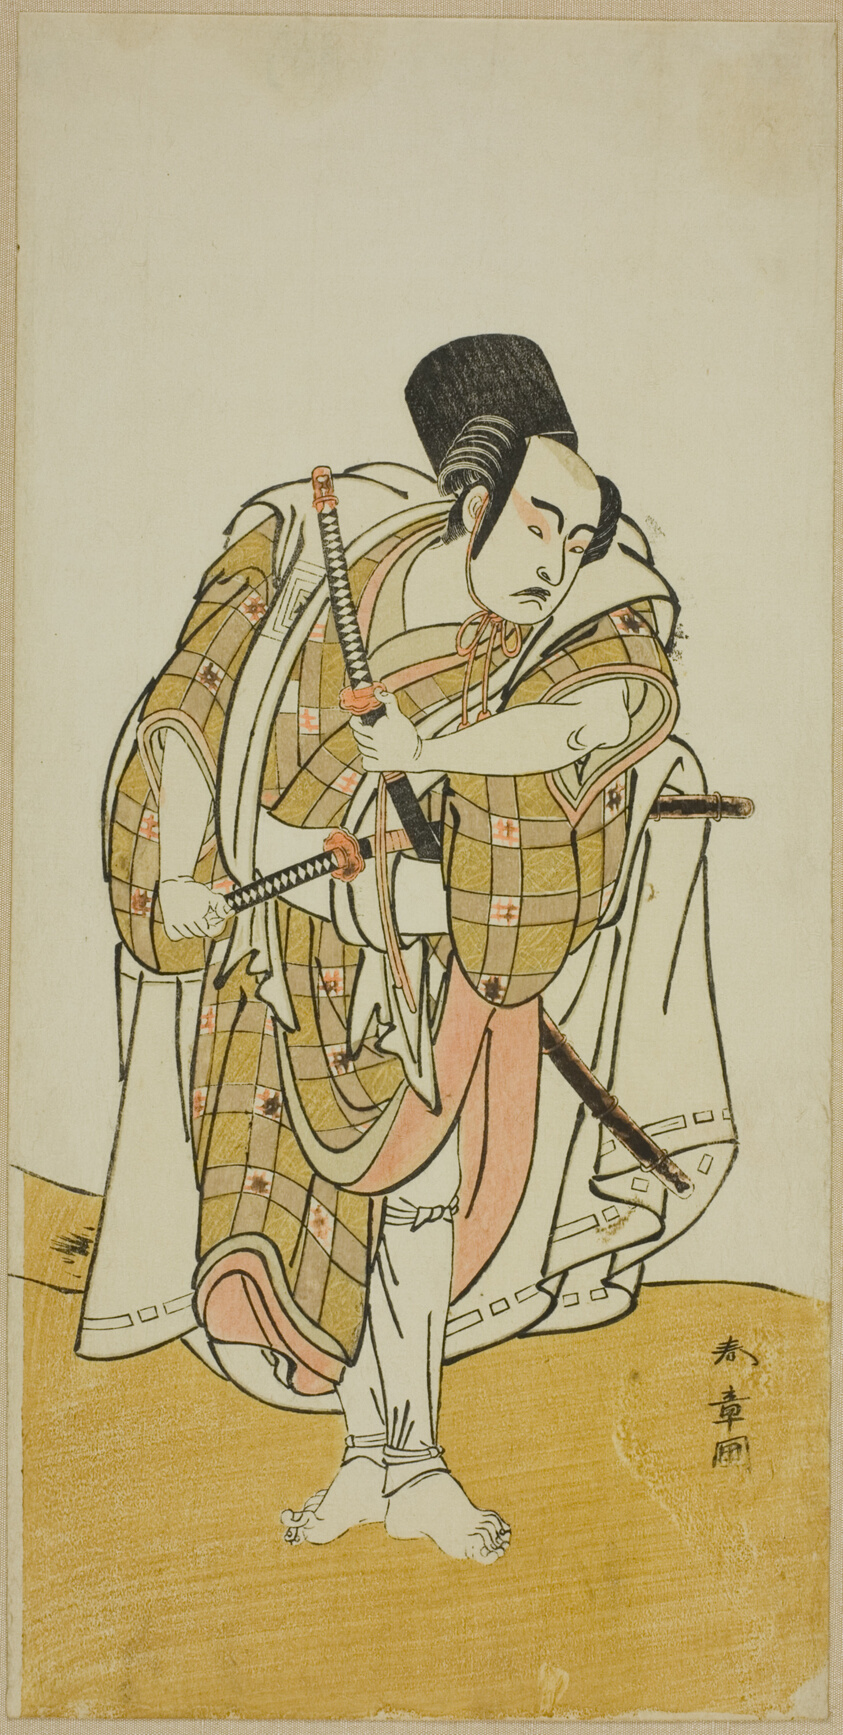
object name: Print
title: The Actor Ichikawa Yaozo II (?)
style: Japanese (culture or style), edo (japanese period), Japanism, East Asian, asian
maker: Katsukawa Shunsho 勝川 春章; Japanese, 1726-1792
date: late 18th century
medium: Color woodblock print; hosoban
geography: Japan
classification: woodblock print; print; asian art